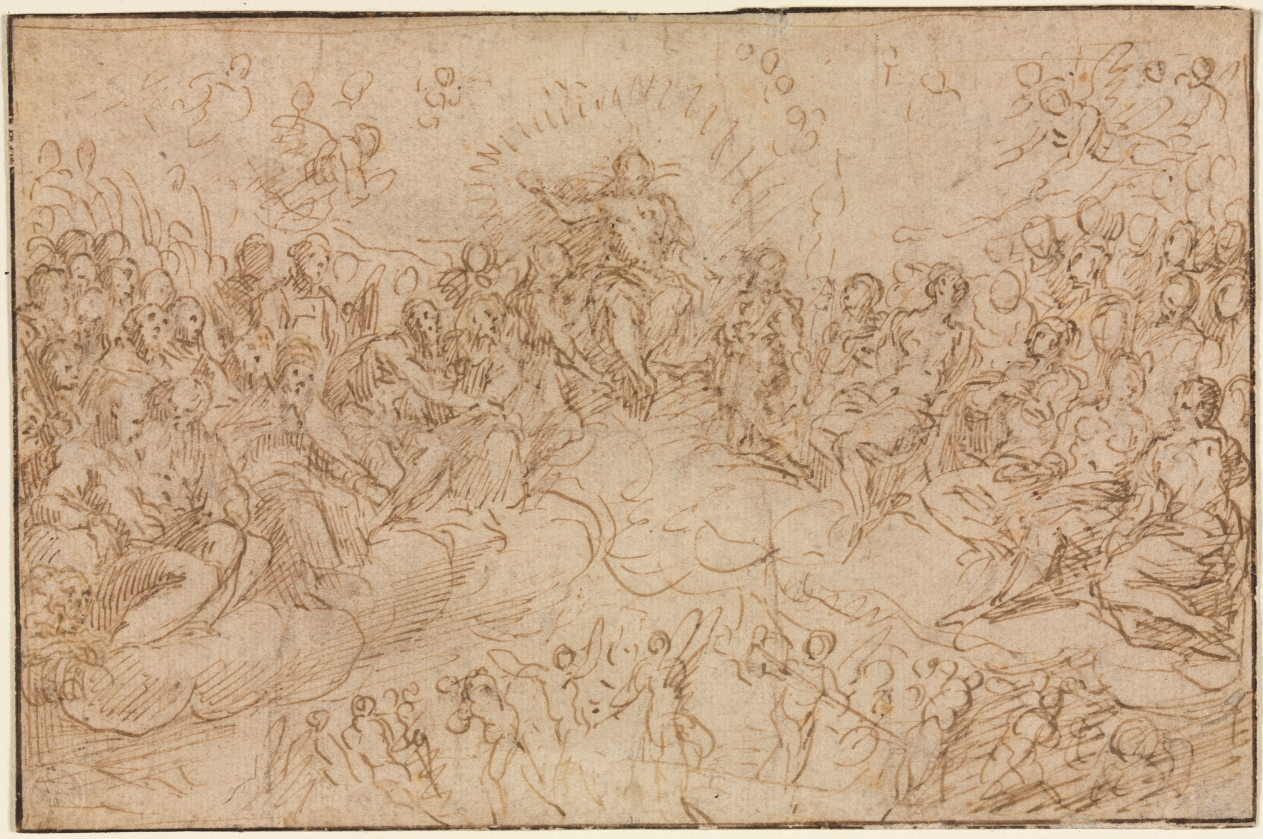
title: The Last Judgment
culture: France, 16th century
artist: after Jean Cousin (French, c. 1490–c. 1560)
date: 1500s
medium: pen and brown ink; framing lines in black ink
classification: Drawing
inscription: VERSO, upper right, in graphite: album sur blanc ; center, in graphite: [illegible] ; center, in graphite: [illegible] ; across bottom, in red pencil: #A101 25ºº ; lower center, in graphite: 101 [circled]